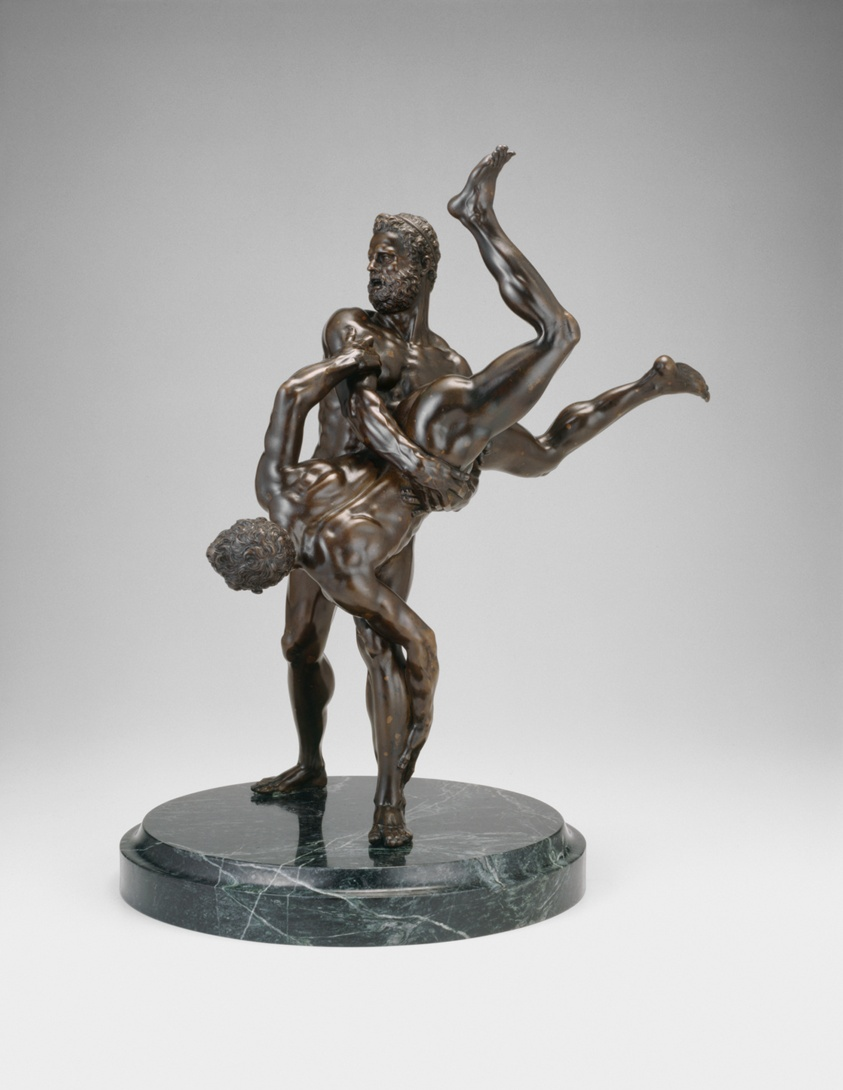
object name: Sculpture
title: Hercules and Lichas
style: 17th Century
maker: Italian (After designs by Giambologna (Flemish, active Italy, 1529–1608))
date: 1600–1625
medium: Bronze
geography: Italy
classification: statuette; sculpture; bronze; figure; Italian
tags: wrestlers, battles, figure, men, nudes